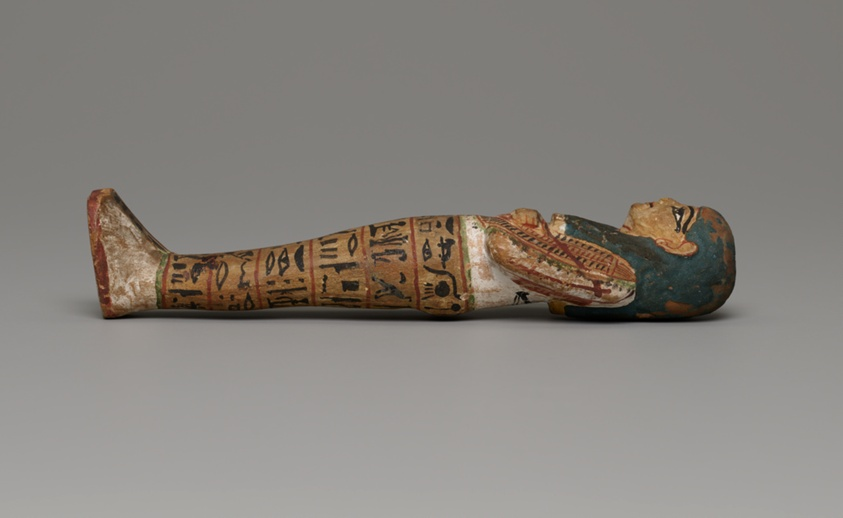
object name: Funerary Object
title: Shabti (Funerary Figurine) of Mayat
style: new kingdom, ancient, egyptian, nineteenth dynasty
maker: Egyptian; probably Thebes (modern Luxor), Egypt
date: New Kingdom, Dynasty 19 (about 1295–1186 BCE)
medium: Wood, gesso, and pigment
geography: Egypt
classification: ushabti; wood; funerary; figurine; ancient art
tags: funerary art, Hieroglyphs, mummies, women